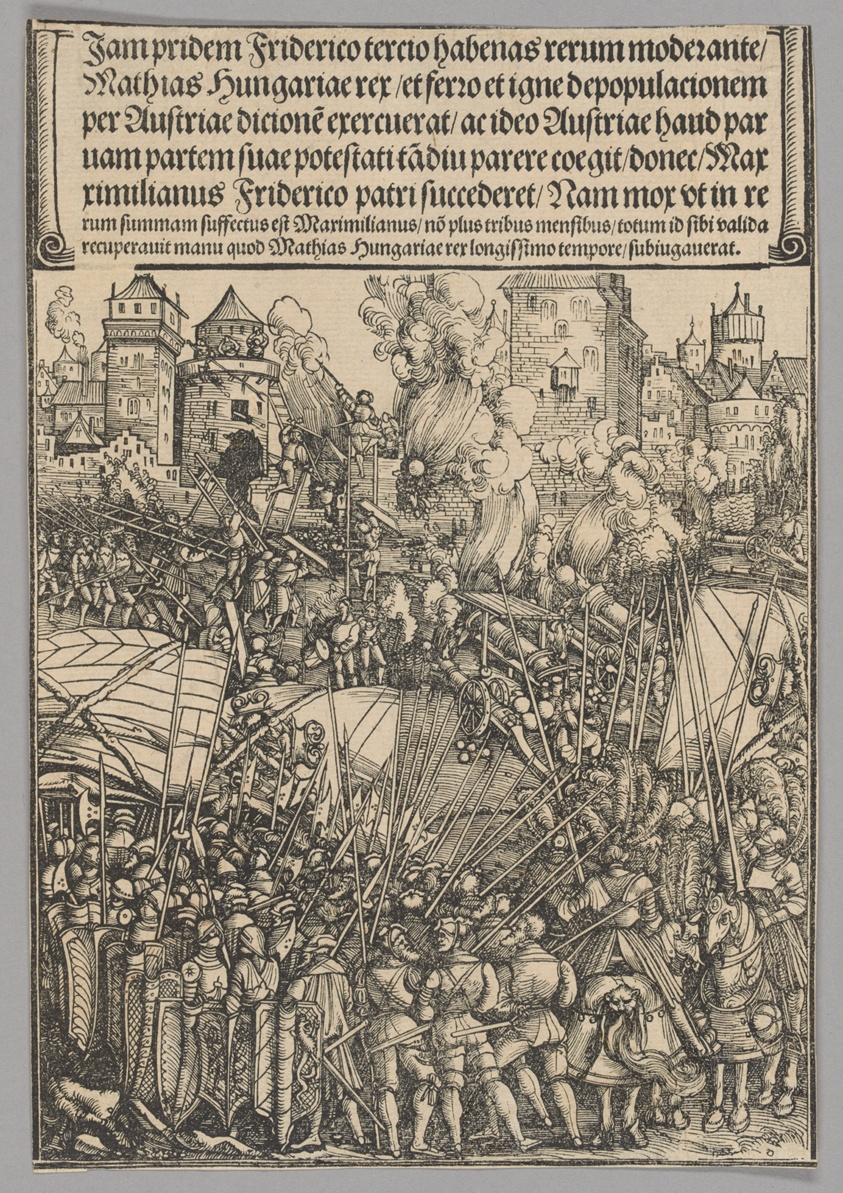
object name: Print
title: Expulsion of the Hungarians, plate 13 from Historical Scenes from the Life of Emperor Maximilian I from the Triumphal Arch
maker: Hans Springinklee (German, c. 1495-after 1522); printed by Hieronymus Andreae (German, died 1556)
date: 1515-17, printed c. 1520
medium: Woodcut in black ink on cream laid paper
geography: Germany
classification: print; paper; woodcut; prints and drawing